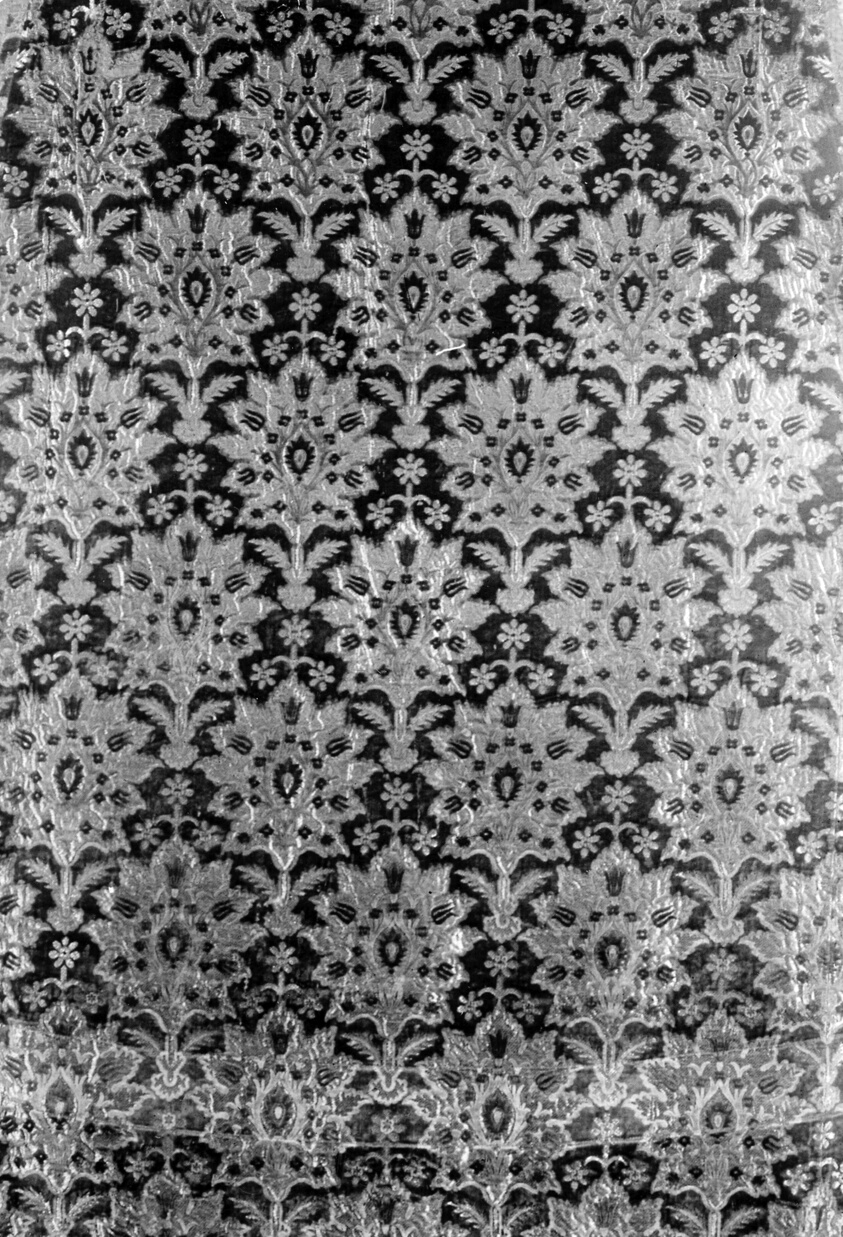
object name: Costume and Accessories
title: Chasuble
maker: Russia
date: 19th century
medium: Red and gold silver velvet and metal brocade; cut voided cloth velvet; coat with short sleeves open on sides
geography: Russia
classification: textile; weaving - velvet; weaving; liturgical; costume